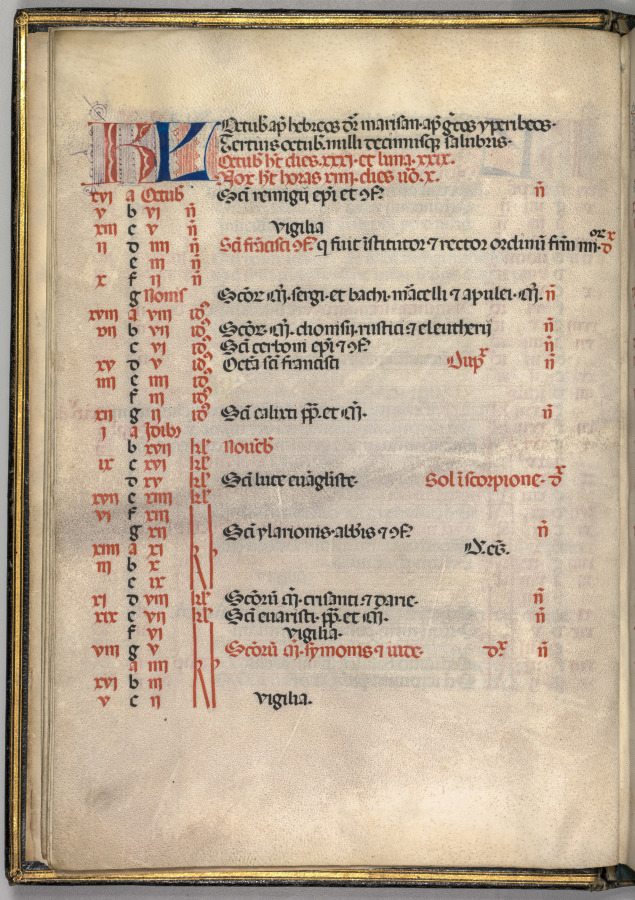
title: Missale: Fol. 7v: October Calendar Page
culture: Italy, Perugia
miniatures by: Bartolommeo Caporali (Italian, c. 1420–1503)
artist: assisted by Giapeco Caporali (Italian, d. 1478)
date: 1469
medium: ink, tempera and burnished gold on vellum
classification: Bound Volume